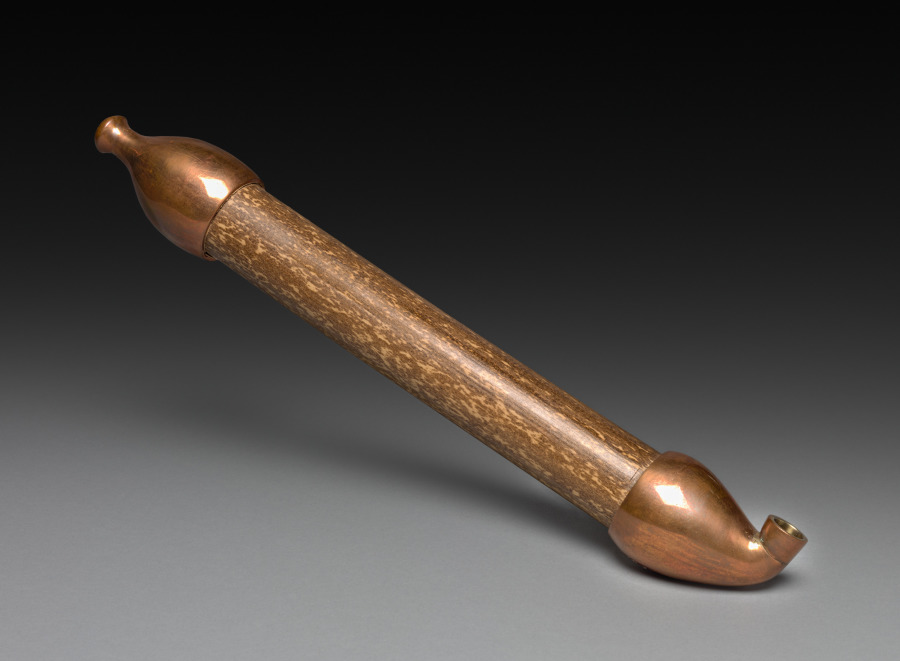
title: Tobacco Pipe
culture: Japan, Edo period (1615–1868)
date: early to mid-1800s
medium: bamboo and copper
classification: Miscellaneous